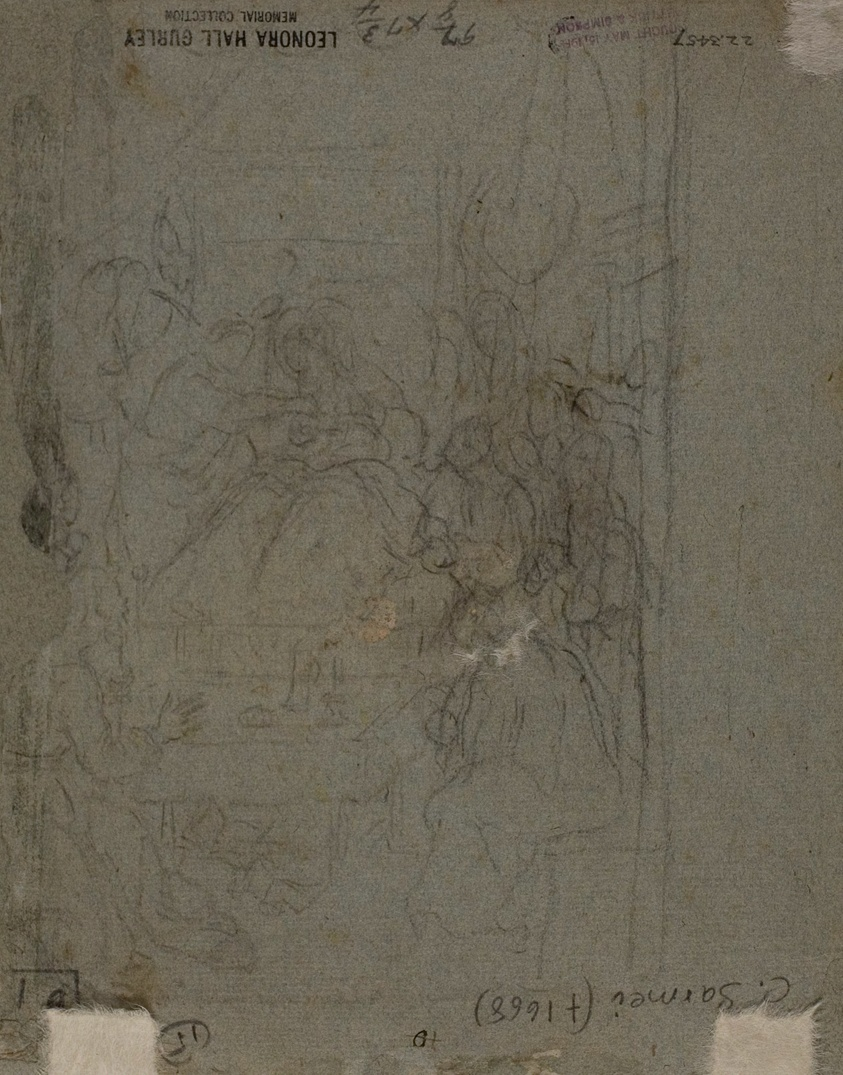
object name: Drawing and Watercolor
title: Christ and the Apostles (recto); Sketch of a Nativity Scene (verso)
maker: Unknown Artist; Italian, Late 16th century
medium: Black chalk heightened with white chalk (recto), and black chalk (verso), on blue laid paper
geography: Italy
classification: chalk; drawings (visual works); prints and drawing